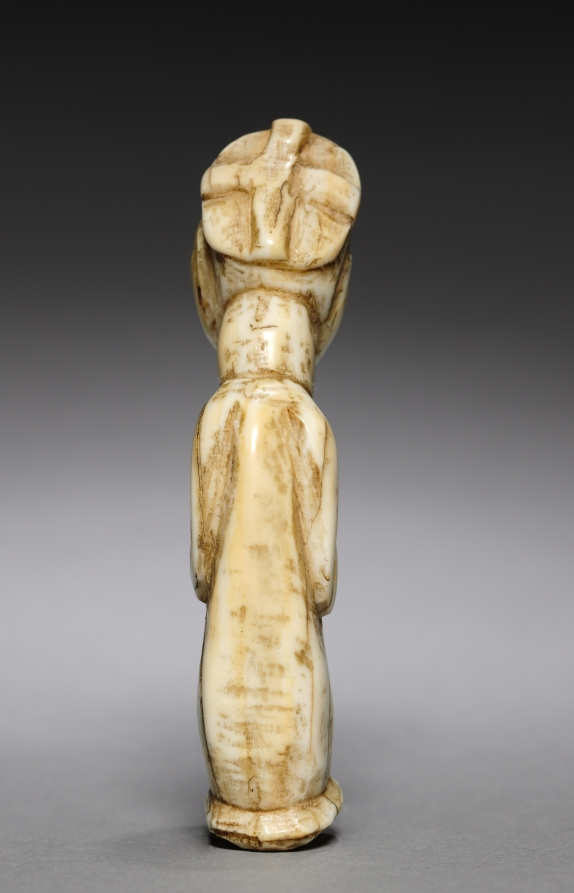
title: Figure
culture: Central Africa, Democratic Republic of the Congo, Luba, 20th century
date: 1900s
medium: ivory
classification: Sculpture